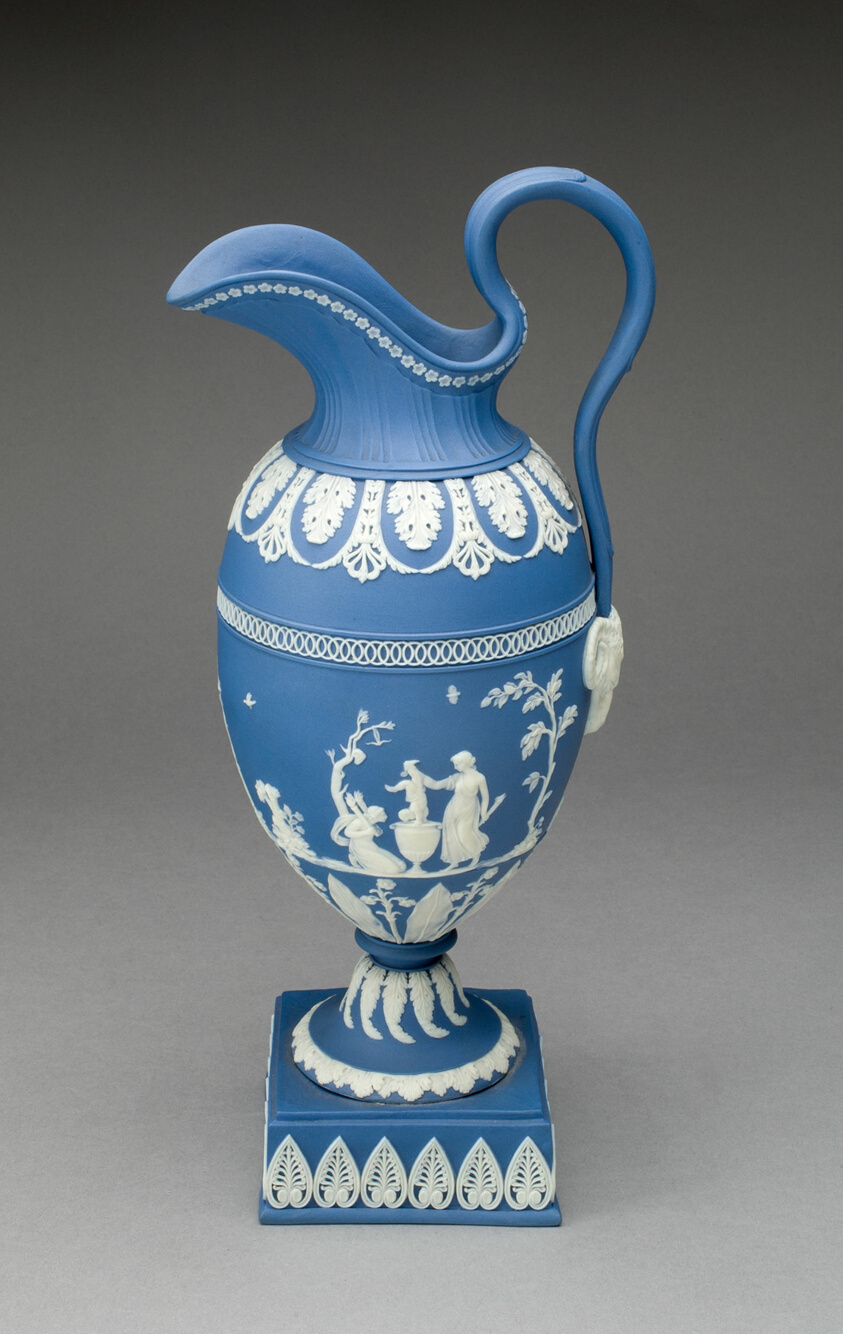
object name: Ceramics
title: Ewer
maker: William Adams & Sons Ltd.; English, founded 1657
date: c. 1790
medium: Stoneware (jasperware)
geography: England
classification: ewer (vessel); vessel; vase; ornamental piece; stoneware; european decorative arts; ceramics